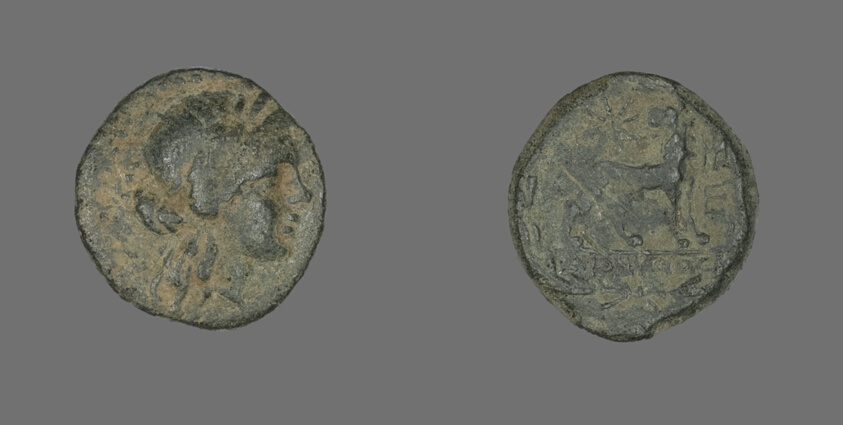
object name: Coin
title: Coin Depicting the God Apollo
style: greek, ancient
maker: Greek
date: about 250-190 BCE or later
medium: Bronze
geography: Ancient Greece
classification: coin; ancient art